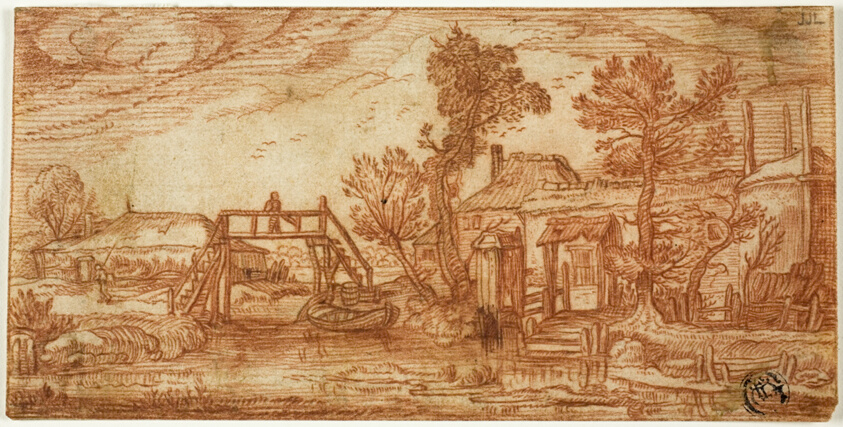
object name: Drawing and Watercolor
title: Canal with Bridge and Houses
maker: After Jan van de Velde, I (Dutch, c. 1568-1623); or after Esaias van de Velde, I (Dutch, 1587-1630); or Adriaen van de Velde (Dutch, 1636-1672)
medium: Red chalk over traces of graphite, on ivory laid paper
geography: Holland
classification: chalk; drawings (visual works); prints and drawing